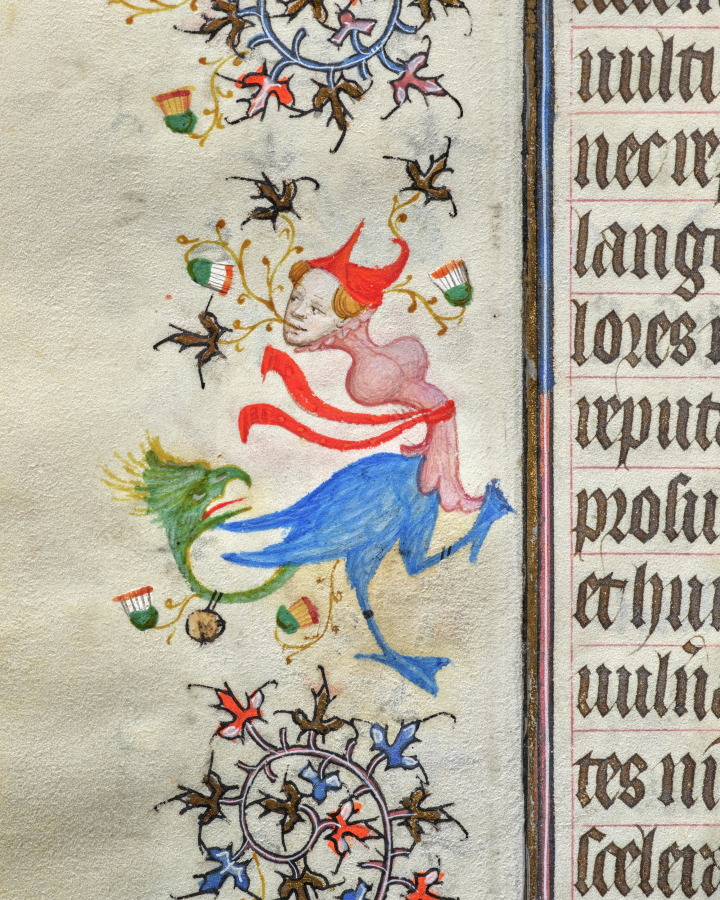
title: Hours of Charles the Noble, King of Navarre (1361-1425): fol. 155v, Text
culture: France, Paris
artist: Master of the Brussels Initials and Associates (French)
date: c. 1405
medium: ink, tempera, and gold on vellum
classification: Bound Volume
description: This precious volume was obviously highly prized by its owner, the French-born King of Navarre, who had his coat of arms painted on no less than twenty folios. Rather than directly commissioning this manuscript from a specific workshop, it seems that Charles the Noble acquired his book of hours -- perhaps ready-made for the luxury market -- while on a trip to Paris in 1404-05. A collaborative effort, six painting styles are evidenced within the pages of this codex, those of two Italians, two Frenchmen, and two Netherlanders. The painter who was responsible for the planning and decoration of the book, and who produced seventeen of the large miniatures, was a Bolognese artist known as the Master of the Brussels Initials. His principal assistant, responsible for most of the borders, was a Florentine who signed his name "Zecho" da Firenze on folio 208 verso.